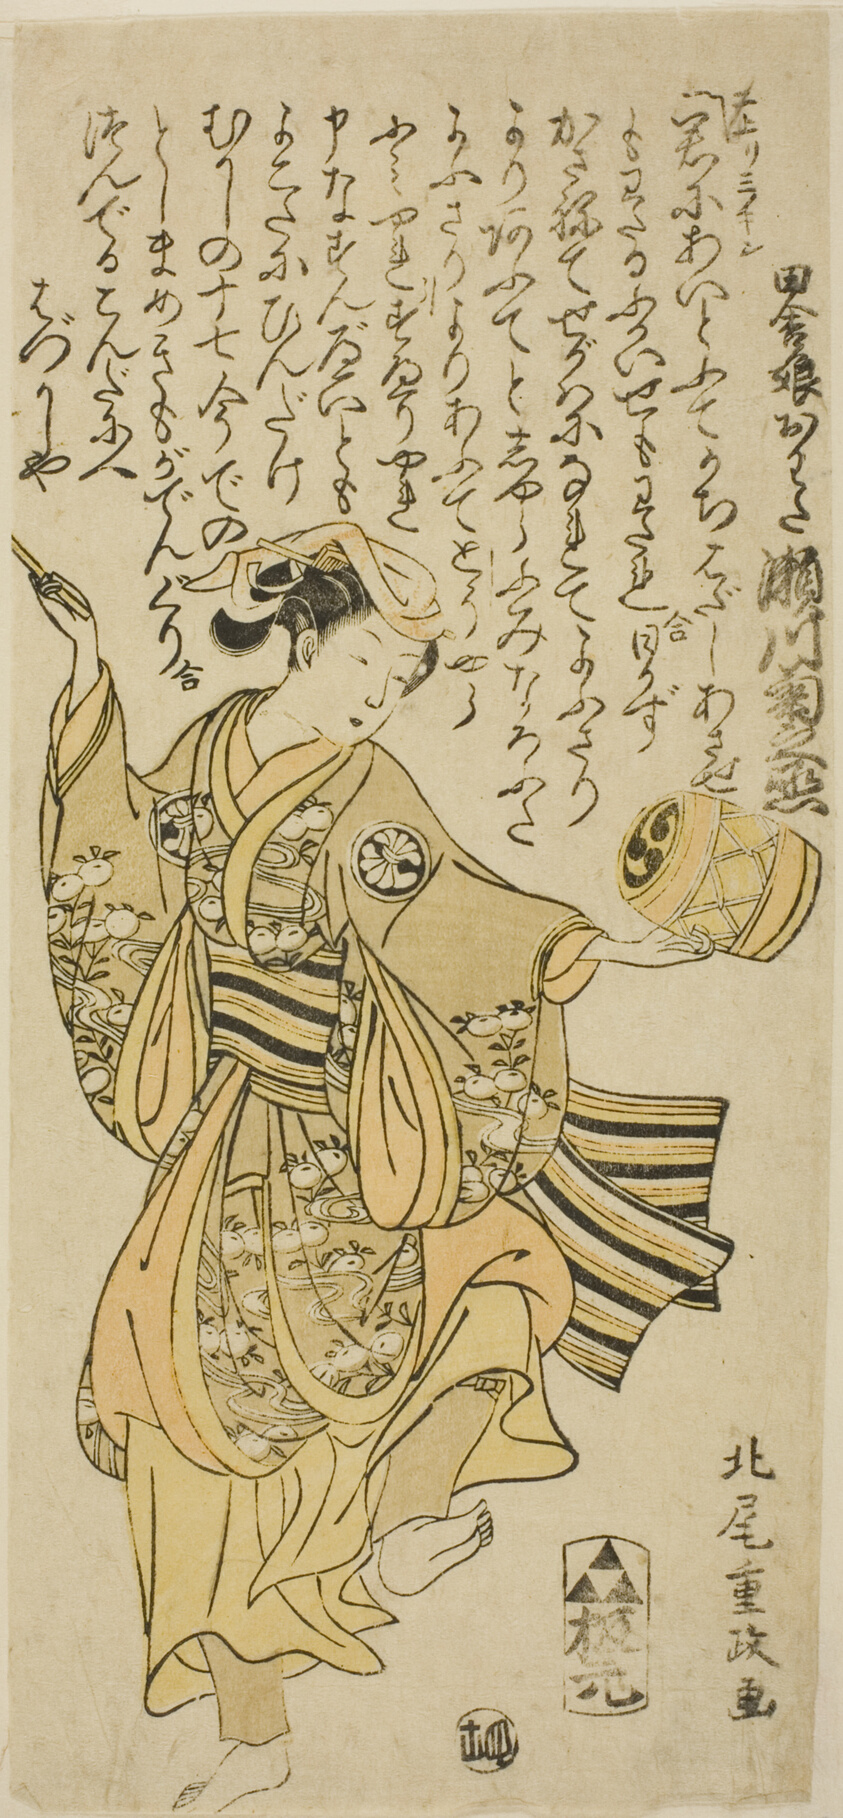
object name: Print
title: The Actor Segawa Kikunojo II as Owata in the play "Taiheiki Shizunome Furisode," performed at the Nakamura Theater in the eleventh month, 1767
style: Japanese (culture or style)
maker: Kitao Shigemasa (Japanese, 1739-1820)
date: 1767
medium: Color woodblock print; hosoban, benizuri-e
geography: Japan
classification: woodblock print; print; asian art